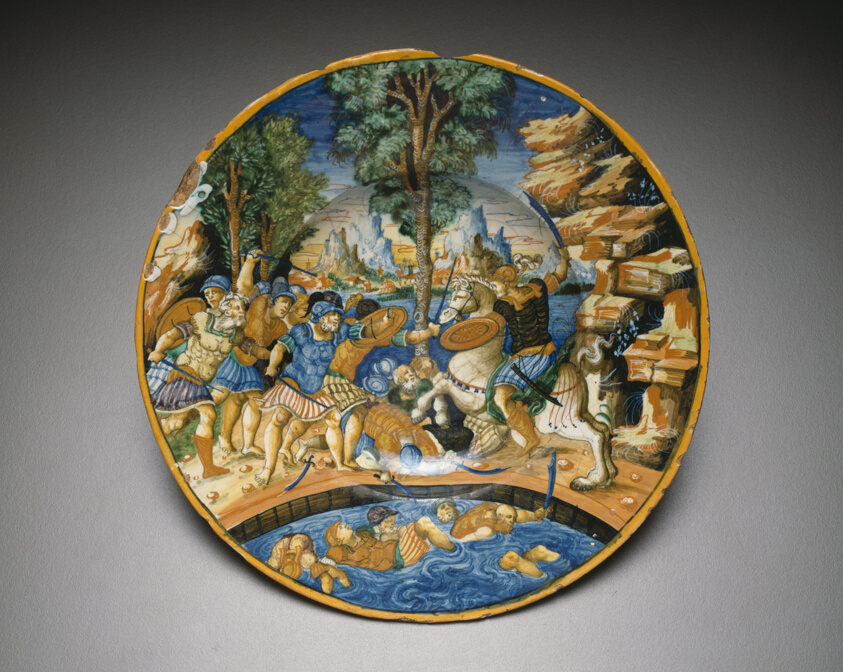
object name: Ceramics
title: Plate with Horatio at the Bridge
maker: Italian; Urbino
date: c. 1535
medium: Tin-glazed earthenware (maiolica)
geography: Urbino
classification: earthenware; european decorative arts; ceramics; decorative arts